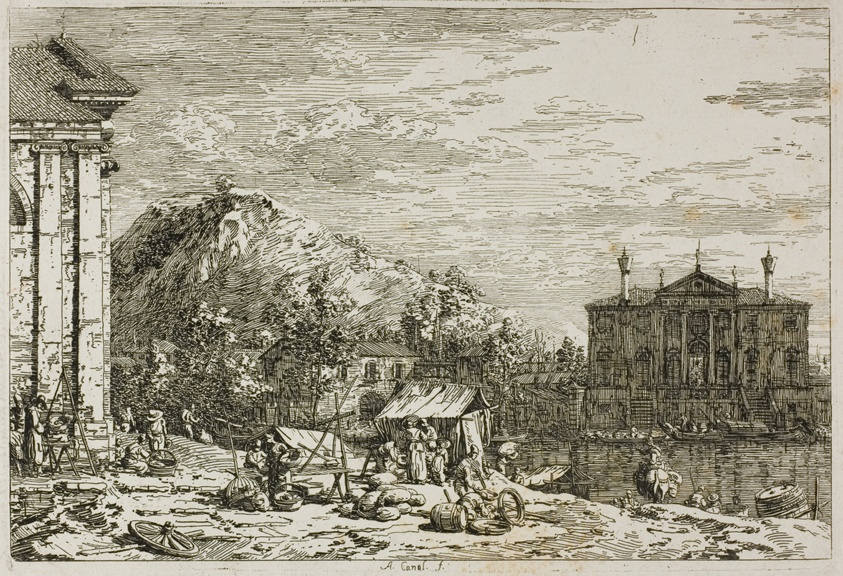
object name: Print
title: The Market at Dolo, from Vedute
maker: Canaletto (Italian, 1697-1768)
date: 1735/44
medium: Etching in black on ivory laid paper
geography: Italy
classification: etching; print; prints and drawing